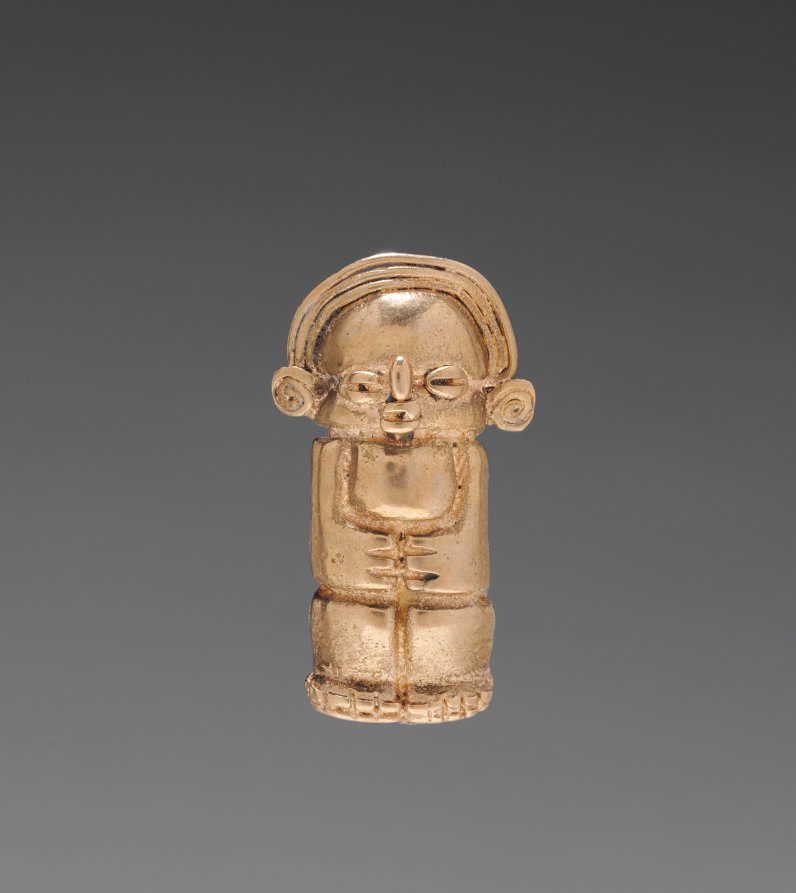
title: Necklace Figurine Bead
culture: Colombia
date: 1–700 CE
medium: cast gold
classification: Jewelry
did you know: Working with gold dates back to at least 500 BC in Ecuador and Colombia.